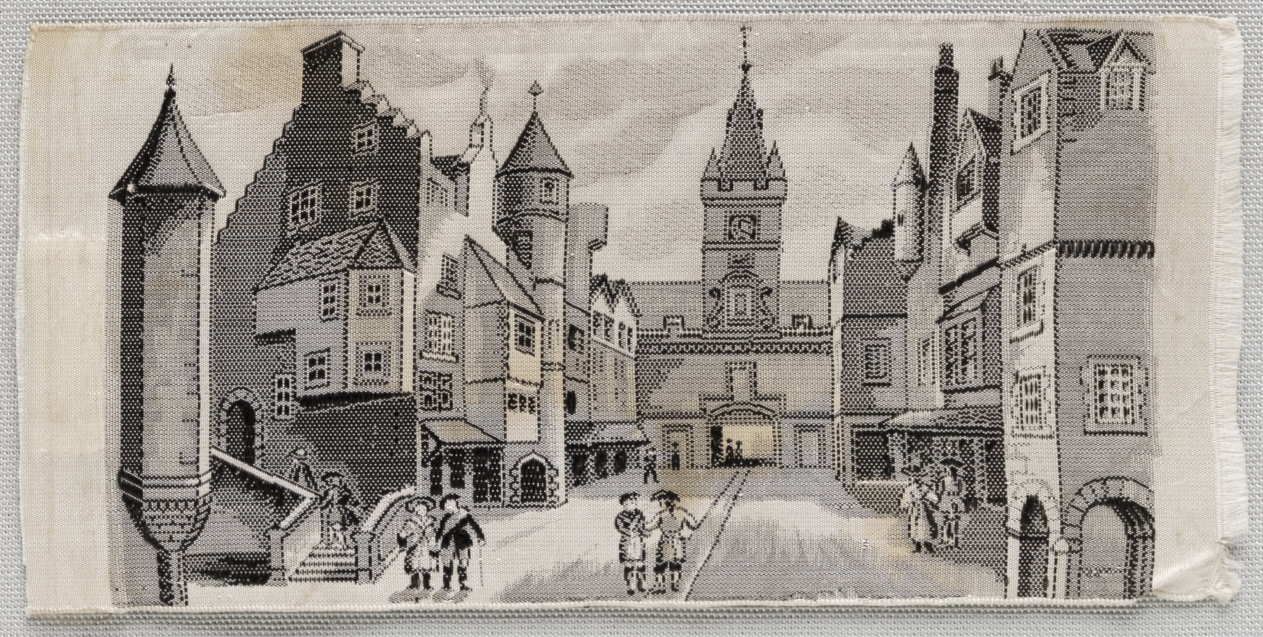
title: View of Coventry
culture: England (?), 20th century (?)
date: 1900s (?)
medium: jacquard weave silk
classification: Textile